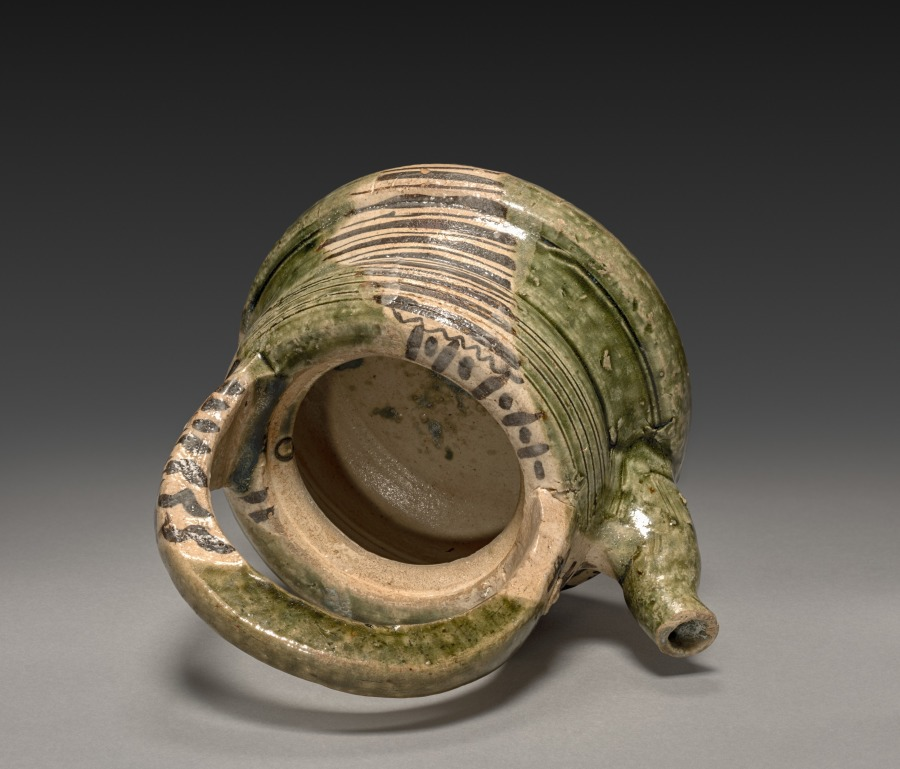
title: Ewer (Suichu)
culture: Japan, Momoyama period (1573–1615)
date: early 1600s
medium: Glazed stoneware with iron oxide underglaze slip (Mino ware, Oribe type)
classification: Ceramic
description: This ewer was made to replenish the jar that holds water for rinsing teabowls and filling the iron kettle at tea gatherings. Highly abstracted pine trees, cascading ivy, stripes, and grids make up the designs in underglaze iron oxide, while the overall surface alternates between a transparent glaze and a green glaze characteristic of some Oribe tea wares.